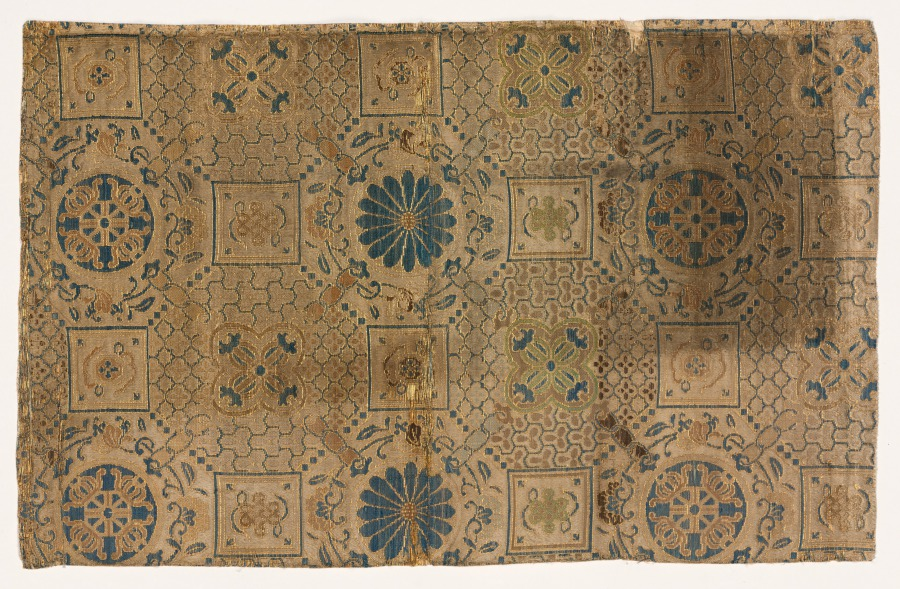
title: Textile Fragment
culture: Japan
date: 1800s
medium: silk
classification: Textile